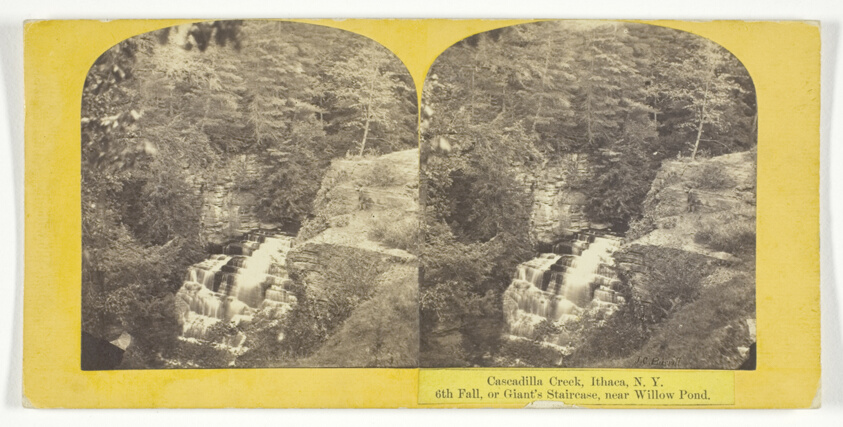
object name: Photograph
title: Cascadilla Creek, Ithaca, N.Y. 6th Fall, or Giant's Staircase, near Willow Pond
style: 19th century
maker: J. C. Burritt; American, active 1860s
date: 1860/65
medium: Albumen print, stereo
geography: Ithaca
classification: photography; photograph; albumen silver print; stereograph (albumen)